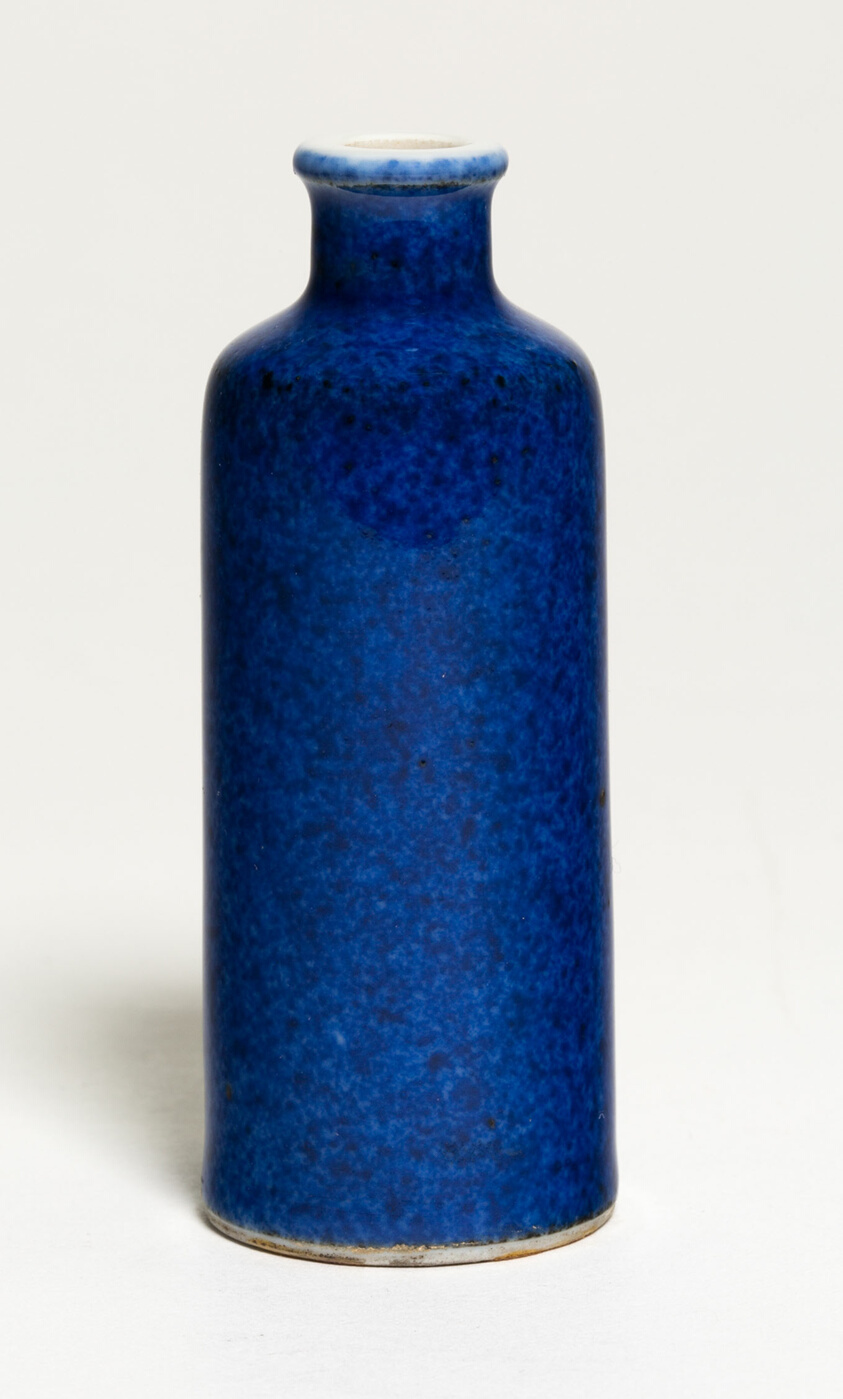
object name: Vessel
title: Miniature Vase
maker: China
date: Qing dynasty (1644–1911), Yongzheng period (1723–1735)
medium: Porcelain with powder blue glaze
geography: China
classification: porcelain; asian art; ceramics